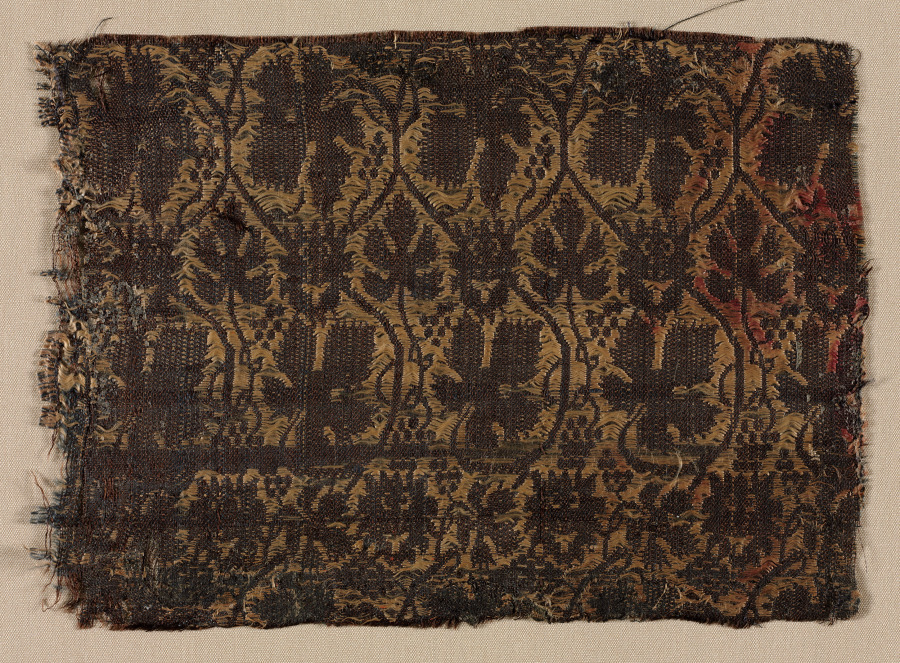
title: Silk Fragment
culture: Iran or Iraq, mid or 2nd half of 14th century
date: 1350–1399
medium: tabby weave with supplementary weft; silk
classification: Textile